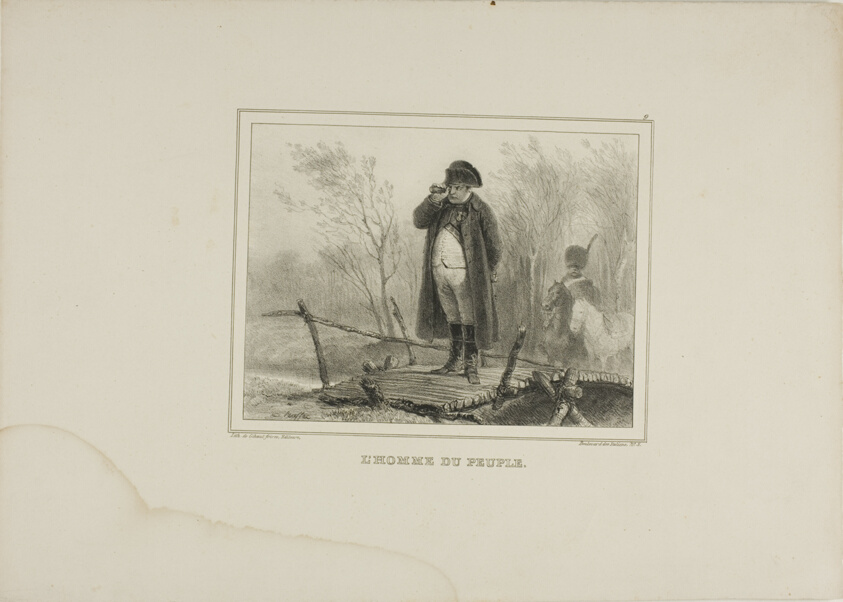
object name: Print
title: Man of the People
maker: Denis Auguste Marie Raffet (French, 1804-1860); printed by Chez Gihaut Frères (French, 19th century)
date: 1836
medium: Lithograph in black on ivory wove paper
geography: France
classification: lithograph; print; prints and drawing